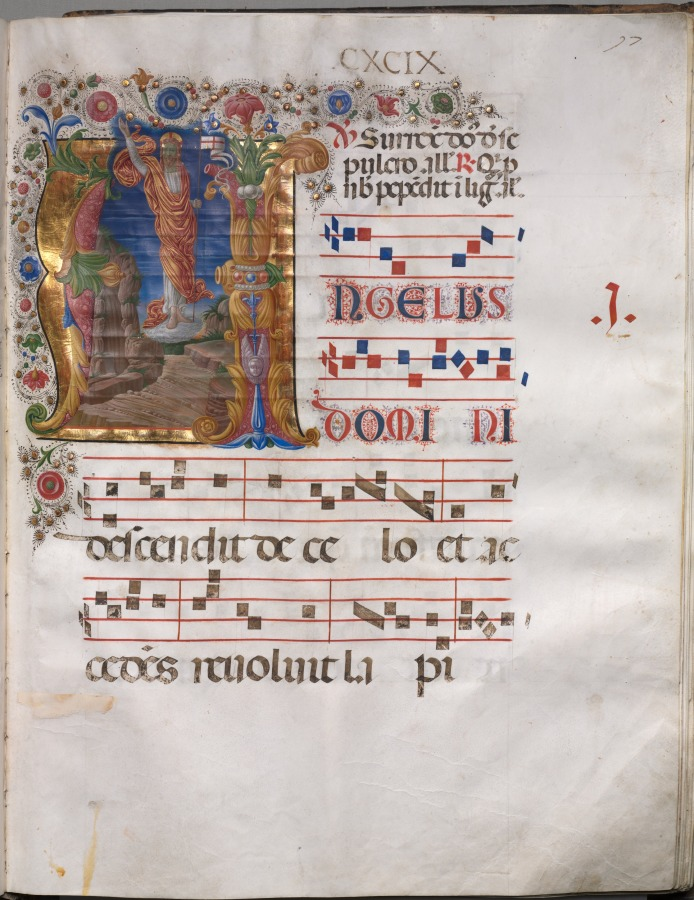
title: Antiphonary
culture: Italy, Siena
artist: follower of Girolamo da Cremona (Italian)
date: c. 1470–80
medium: ink, tempera, and gold on parchment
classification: Manuscript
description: The initial A with the resurrected Christ, shown here, was painted by an immediate follower of Girolamo da Cremona, who was likely working in Siena using the master's designs. Girolamo was intermittently active until 1474 in Siena, where he decorated choir books for the cathedral in collaboration with other North Italian illuminators. Antiphonaries like this one were usually made in several volumes for use by a clerical congregation. They were applied to the singing of the Daily Office, the cycle of daily devotions throughout the year. The chant introduced by this initial reads: Angelus Domini descendit de celo... (An angel of the Lord descended...). It is the First Matins Response for Easter.